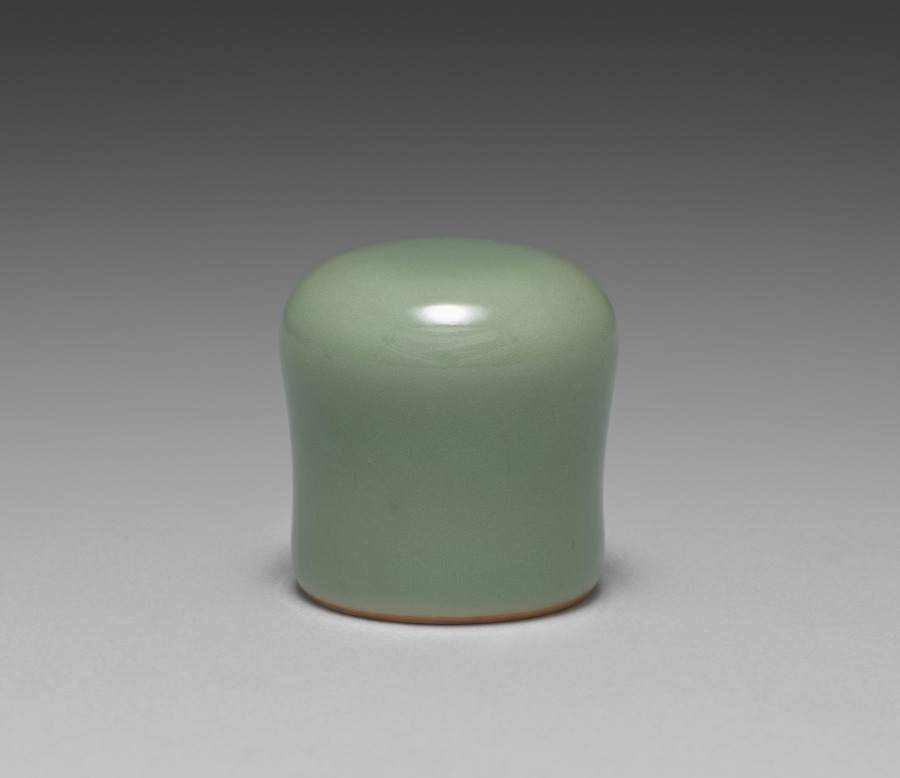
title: Roller End for Hanging Scroll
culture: Japan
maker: Seifū Yohei III (Japanese, 1851–1914)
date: 1893–1914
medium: One of a pair of hanging scroll roller ends; porcelain with celadon glaze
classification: Ceramic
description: Before entering into his apprenticeship with Yohei II, Seifū Yohei III trained as a painter in Osaka. He continued to paint throughout his career as a ceramist. As part of his ceramic practice, Yohei III also made roller ends to be placed at either end of the wooden dowel around which the lower part of a hanging scroll mounting is wrapped. These served both as weights for the painting and as knobs for handling it when rolling and unrolling. The pair here is made of porcelain with a green glaze.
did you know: This is one of two roller ends for the hanging scroll by Seifū Yohei III, Rain Clearing over a Summer’s Mountain, CMA 2022.151.